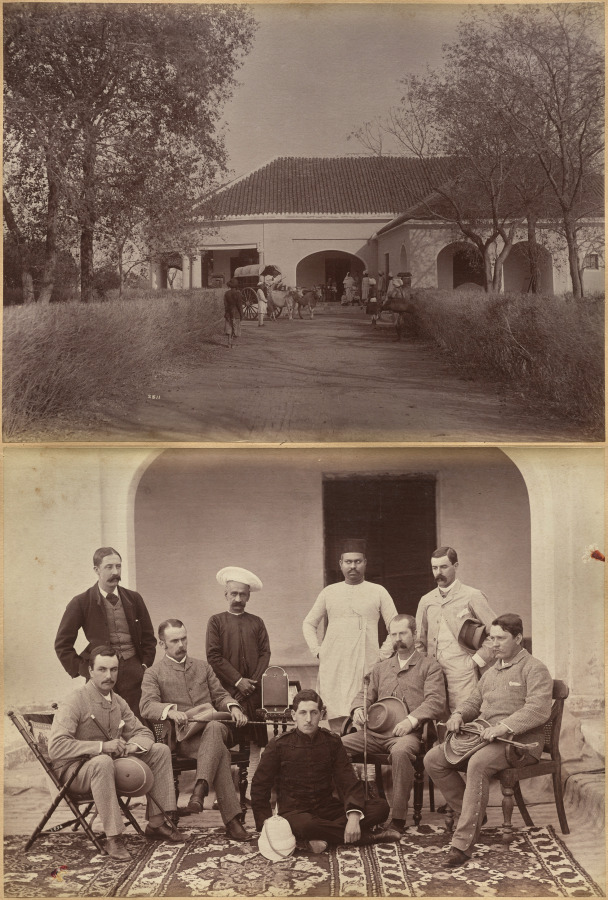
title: Civil officers at Jhansi (recto); Mr. William's House, Jhansi (verso)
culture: India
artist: Raja Deen Dayal (Indian, 1844–1905)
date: c. 1882–87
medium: albumen print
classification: Photograph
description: These photographs are part of an album, now disassembled, of around 105 photographs taken in India between 1885 and summer 1887 that provide glimpses into the lives of the British colonial elite and royal and upper-class Indians. The museum holds another group of 37 pictures from this album (2016.266), which was probably commissioned by a British civil servant visiting or working in India around 1888 as a personal souvenir of his experiences there.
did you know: Raja Deen Dayal is regarded now, and was considered during his lifetime, to be India’s most important 19th-century photographer.